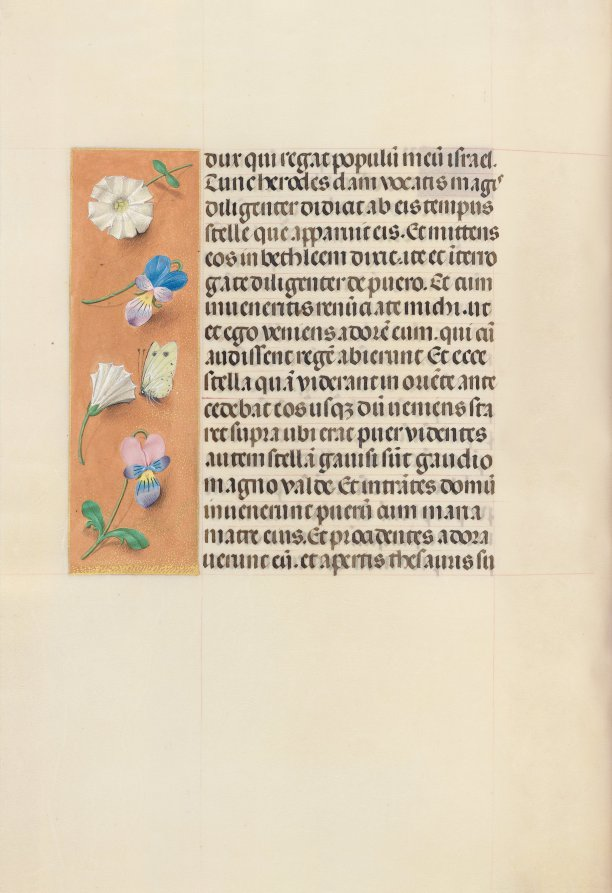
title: Hours of Queen Isabella the Catholic, Queen of Spain: Fol. 95v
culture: Flanders, Ghent and Bruges, late 15th century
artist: Master of the First Prayerbook of Maximillian (Flemish, c. 1444–1519)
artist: and Associates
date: c. 1500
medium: ink, tempera, and gold on vellum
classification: Bound Volume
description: This manuscript was illuminated by a circle of at least five highly organized manuscript painters active in the Flemish cities of Ghent and Bruges. The principal illuminator was Alexander Bening, who painted the majority of the book's miniatures. Manuscripts produced by this circle of artists are renowned for the decoration of their borders, which typically feature a rich variety of realistically-painted flowers, birds, and butterflies. This prayer book, called a book of hours, was intended not for a cleric, but for the private devotions of a lay person-in this case, Isabella the Catholic, Queen of Spain (1451-1504). Isabella's coat of arms embellishes the book's frontispiece. It is unlikely that the book was commissioned by the Queen herself; rather, she probably received it as a diplomatic gift from someone courting her patronage, perhaps Cardinal Francisco Jimenez de Cisneros. A Franciscan friar, Jimenez was dependent upon Isabella for his advancement, first to the post of Queen's confessor in 1492, and then to Archbishop of Toledo in 1495.